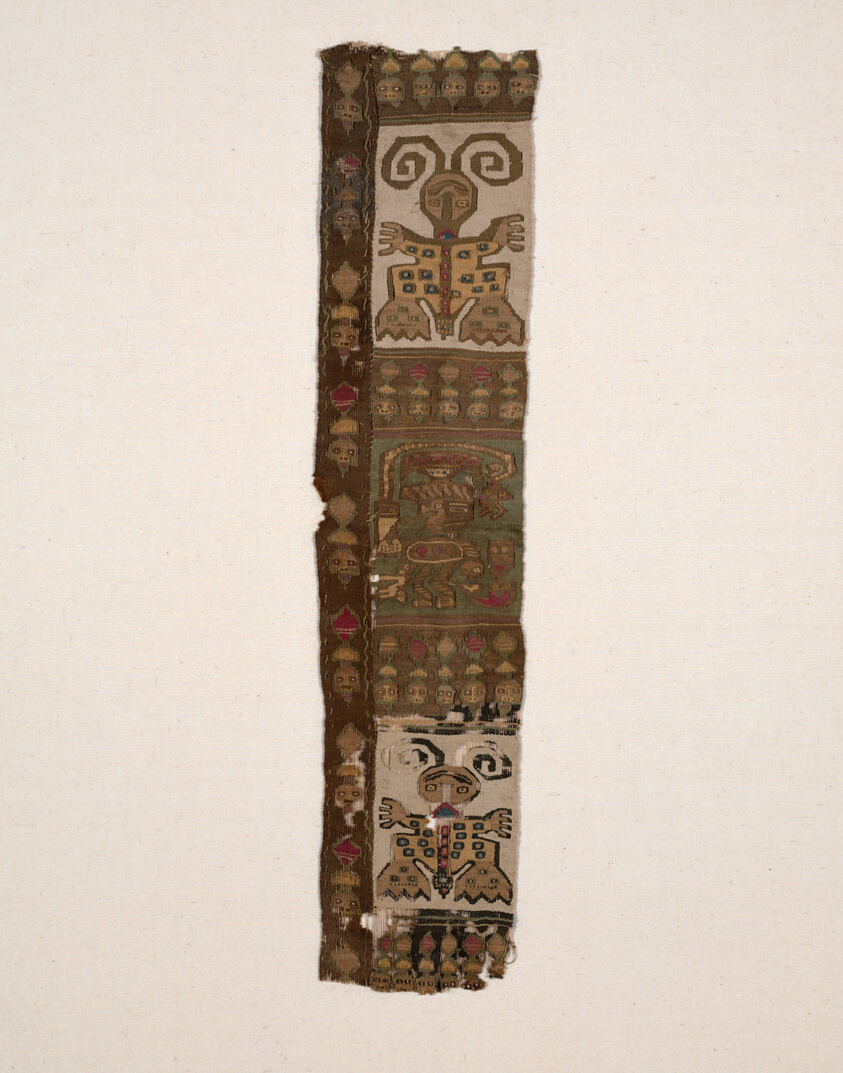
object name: Textile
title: Fragment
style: lambayeque, pachacamac, middle horizon, Pre-Columbian, americas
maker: Lambayeque (Probably north coast, Peru)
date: A.D. 1000/1476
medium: Two panels joined: cotton and wool (camelid), slit and single dovetailed tapestry weave with eccentric and wrapping outlining wefts; one panel embroidered with laced running stitches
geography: Peru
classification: weaving; textile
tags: anthropomorphic figure, birds, butterflies, captive, decapitation, deities, headdresses, heads, ritual, ropes, sacrifice, frog